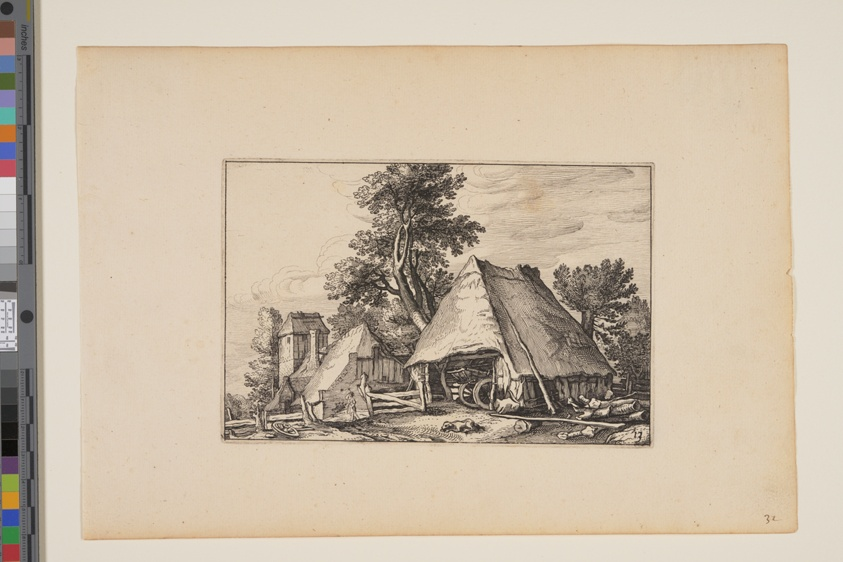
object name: Print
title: Farm with Shed for a Cart, from Landscapes (Verscheyden aerdige Lanthuysen...)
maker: Claes Jansz. Visscher (Netherlandish, c. 1550–c. 1612); after Abraham Bloemaert (Dutch, 1566–1651)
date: 1620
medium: Etching on ivory laid paper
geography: Netherlands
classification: print; paper; prints and drawing; etching